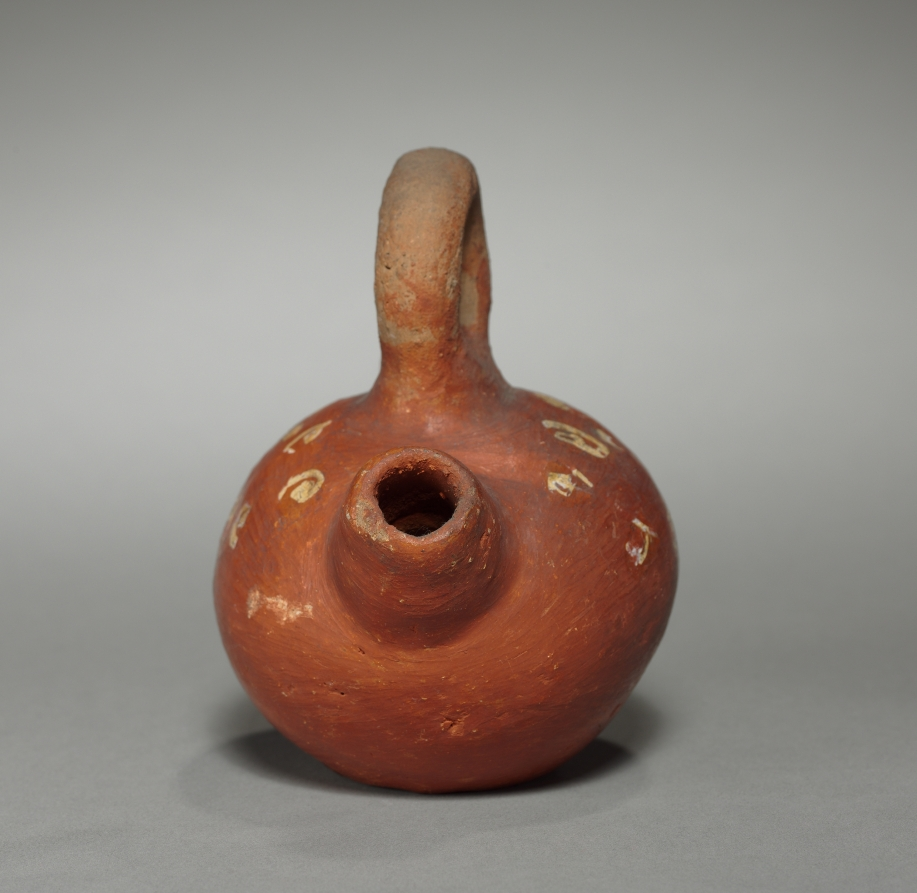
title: Bottle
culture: Peru, 20th century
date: 1900–1920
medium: pottery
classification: Ceramic